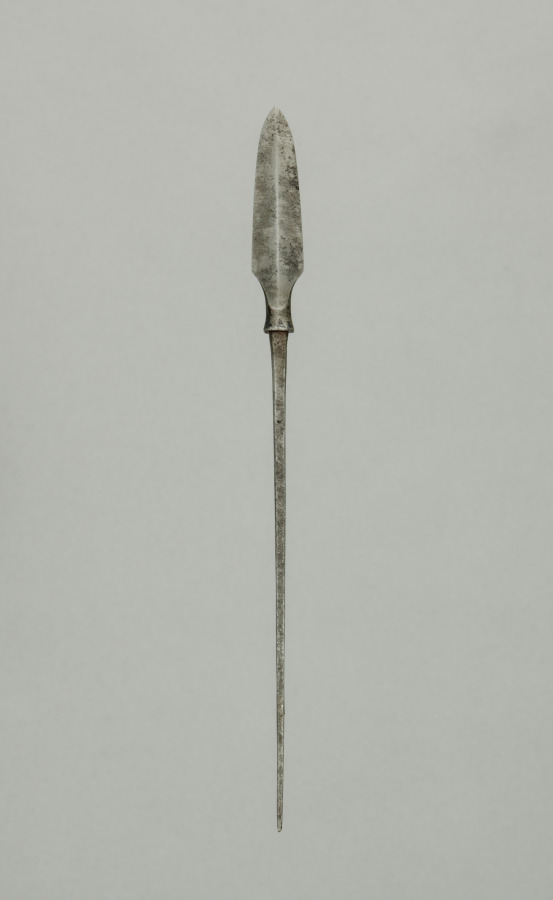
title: Arrow Point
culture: Japan, Edo period (1615–1868)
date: 1700s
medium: steel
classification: Arms and Armor